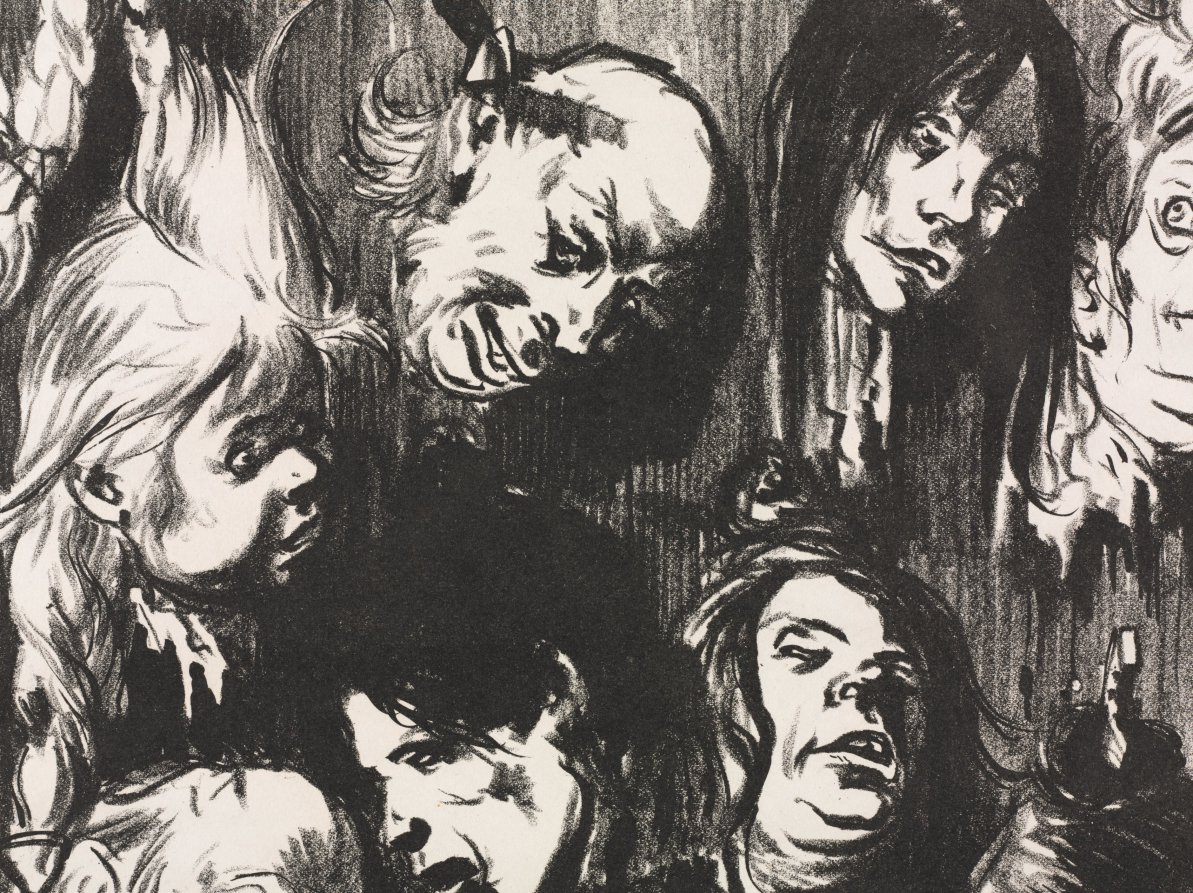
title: Ten Assassinations for a Penny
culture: Switzerland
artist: Théophile Alexandre Steinlen (Swiss, 1859–1923)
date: 1897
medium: lithograph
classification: Print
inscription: in pencil, lower left margin: No 41/50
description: Nineteenth-century French lithographs, including Steinlen’s charged political images, offer wide-ranging documentation of the life at the time. In 1881 France passed a law granting freedom of the press, resulting in numerous magazines of humor and social criticism. An advocate for the poor, the downtrodden, and the working classes, Steinlen contributed artwork to journals linked to the leftist movement, such as the anarchist publication La feuille (The Newspaper), in which Ten Assassinations for a Penny was reproduced. Steinlen’s illustrations for La feuille comment satirically on the articles written by Zo d’Axa, the editor-in-chief. A sense of gloom and violence that parallels the pessimism of the writing permeates the somber images. Marked by strong contrasts of black and white, Ten Assassinations for a Penny has an unsettling, even frightening quality intended to shock the reader into acknowledging the deep-seated problems in French society.